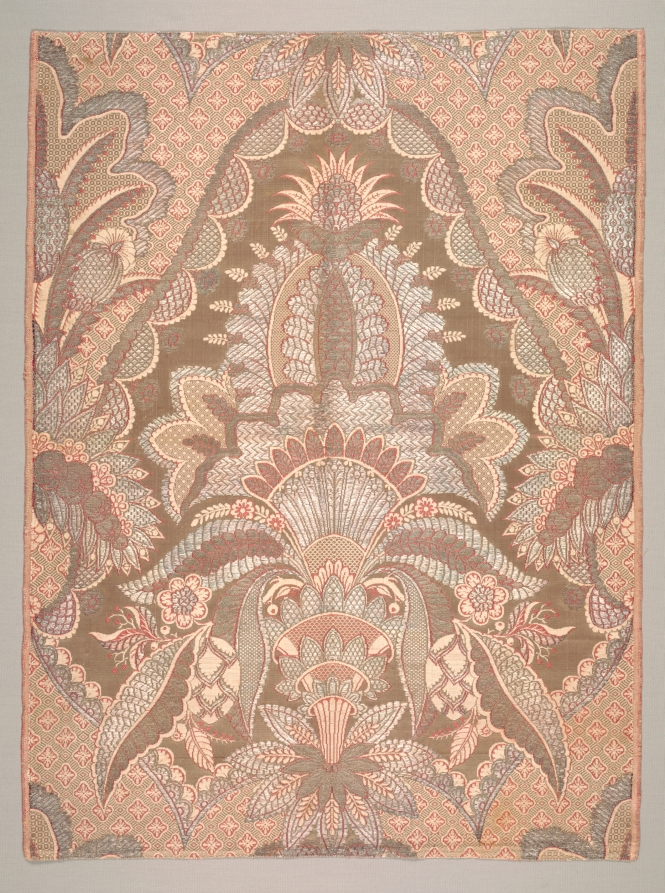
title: Textile Fragment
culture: France, early 18th century, late Baroque (1715-1725)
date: c. 1715–1725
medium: lampas weave, silk and gold thread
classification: Textile